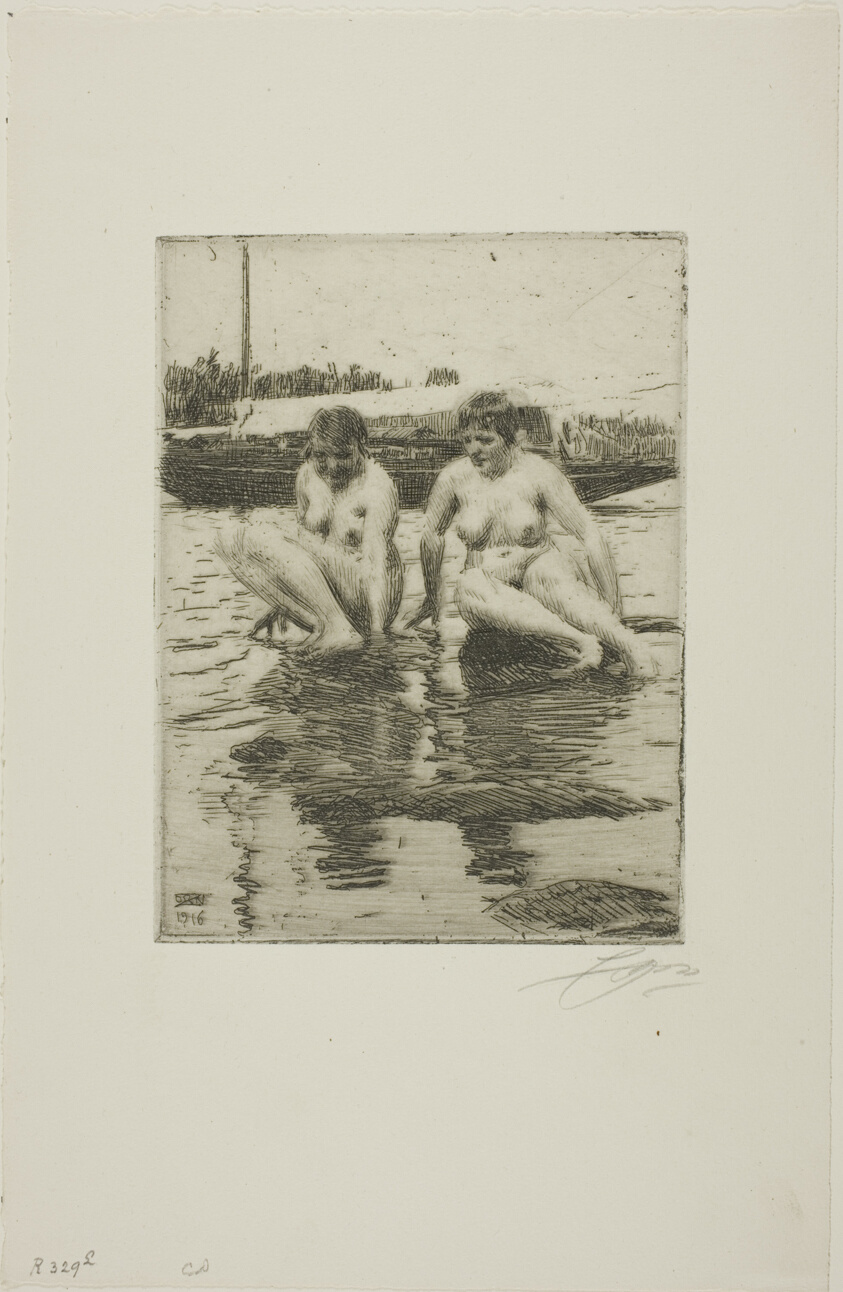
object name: Print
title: My Models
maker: Anders Zorn (Swedish, 1860-1920)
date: 1916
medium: Etching on ivory laid paper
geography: Sweden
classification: etching; print; prints and drawing